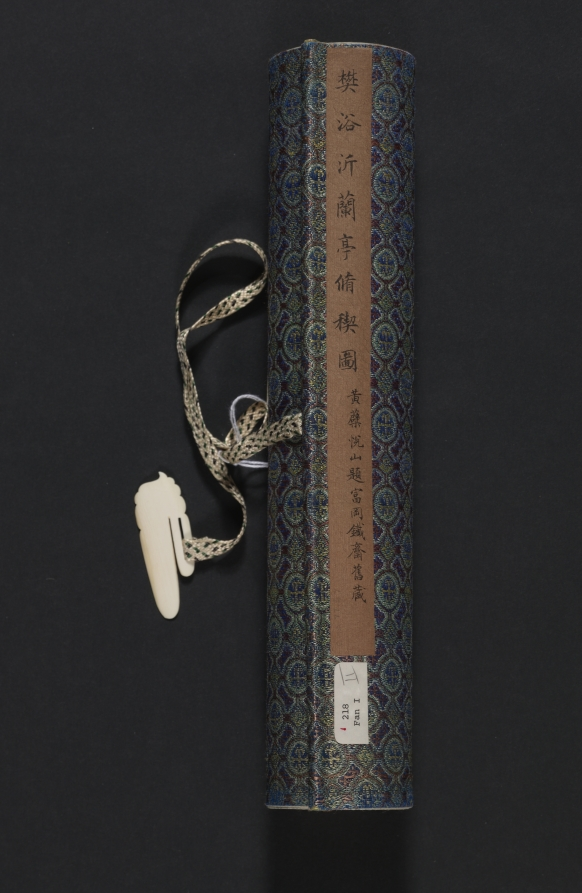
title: Purification at the Orchid Pavilion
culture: China, Qing dynasty (1644-1911)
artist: Fan Yi (Chinese, c. 1615–before 1688)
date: 1671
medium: Handscroll; ink and color on silk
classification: Painting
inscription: Artist's inscription, signature, and 2 seals: Painted by Fan Yi of Zhongfu during the second month of winter of the xinhai year [1671]. [2 seals] Fan Yi zhi yin, Zi yu yi.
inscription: Title on the frontispiece by Monk Yueshan (1629-1709).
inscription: 3 colophons and 13 additional seals: 1 colophon, dated 1707, and 6 seals of Yueshan; 2 colophons and 3 seals of Wong Kwan-Shut (Huang Junshi) 黃君實 (b. 1934); 2 seals of Fu Shen 傅 申 (b. 1937); 2 seals of Tessai Tomioka 富岡鐵齋 (1836-1924).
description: By the 1600s, the historic gathering at Lanting, Zhejiang province, in 353 CE was a common theme in Chinese painting. Originally based on a composition attributed to Li Gonglin (1049– 1106), now lost, Wu school artists revived the theme. Fan Yi, the brother of the artist Fan Qi from Nanjing, used delicate brushwork and luminous colors to depict the spring gathering.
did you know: The gathering’s host is in the Orchid Pavilion at the end of the scroll, representing an episode known as “Wang Xizhi Watching the Geese 王羲之觀鵝圖.”